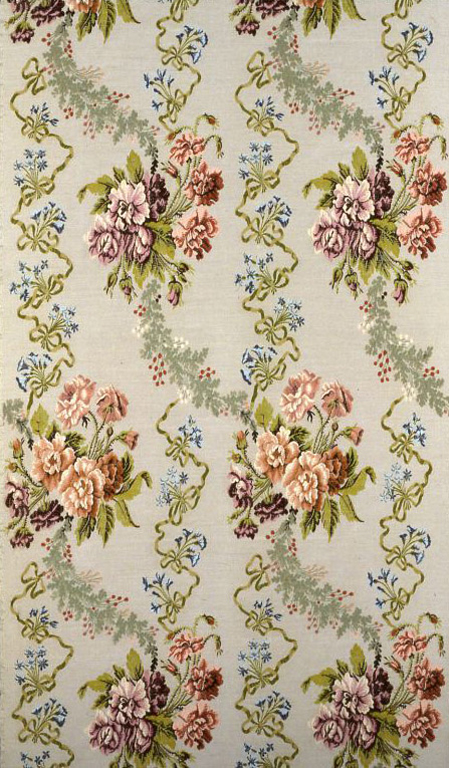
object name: Textile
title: Panel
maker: France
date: c. 1870/80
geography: France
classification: textile; weaving